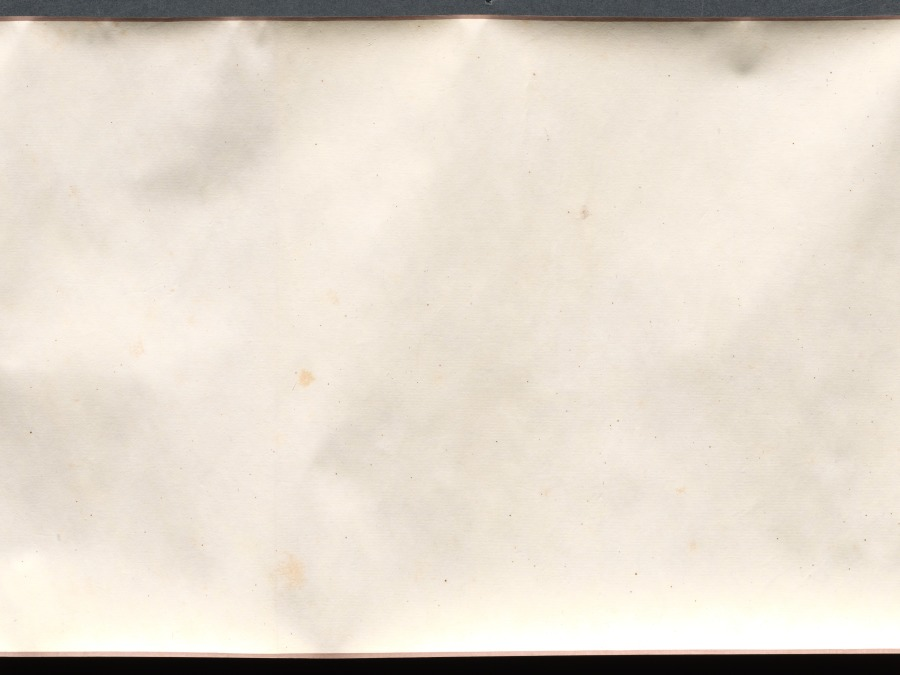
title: Four Poems: Calligraphy in Cursive Script (xingshu)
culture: China, Ming dynasty (1368–1644)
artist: Chen Jiru (Chinese, 1558–1639)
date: 1500s-1600s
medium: handscroll; ink on gold speckled paper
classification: Calligraphy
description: Written in graceful calligraphy with well-composed characters, the artist communicates his thoughts and state of mind in four poems. Characters written in dark, thick strokes convey rhythm, and indicate the moment after the writer had paused to recharge his brush with ink. Chen Jiru was a native of Huating (modern Shanghai). His calligraphy style resembles that of his friend, influential calligrapher Dong Qichang (1555–1636). Unlike Dong, Chen did not pursue government service: he burned his Confucian robes, declined a summons to serve at court, and immersed himself in literature, calligraphy, and painting.